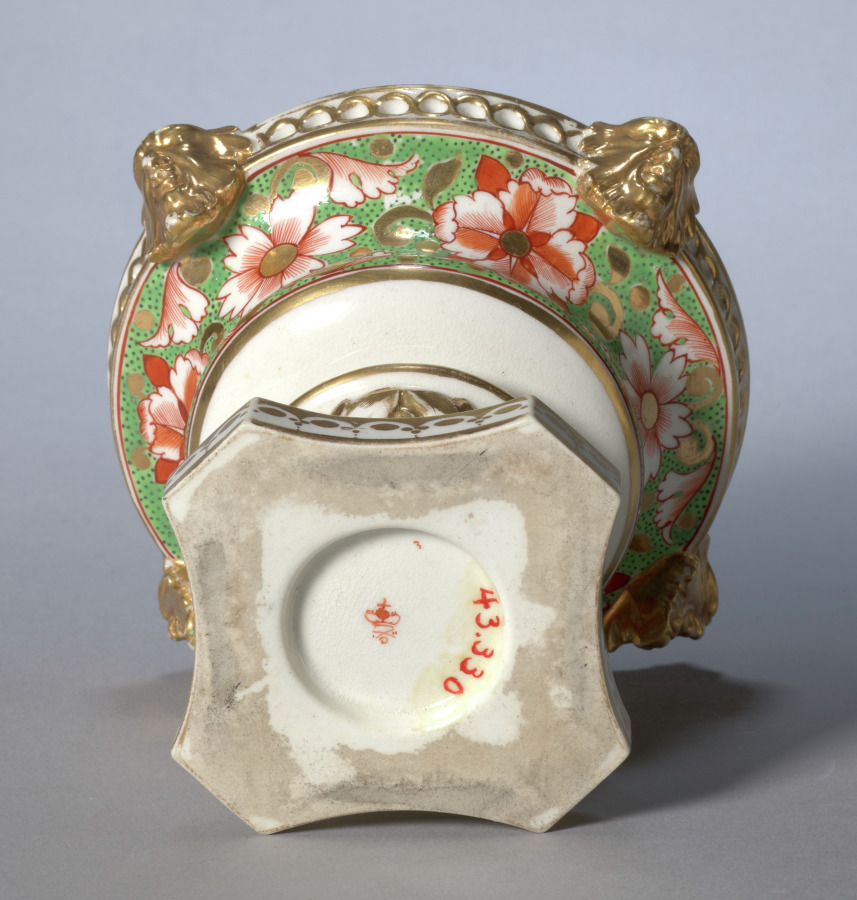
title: Potpourri Vase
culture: England, Derby, 19th century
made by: Derby (Crown Derby Period) (British)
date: c. 1810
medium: porcelain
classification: Ceramic